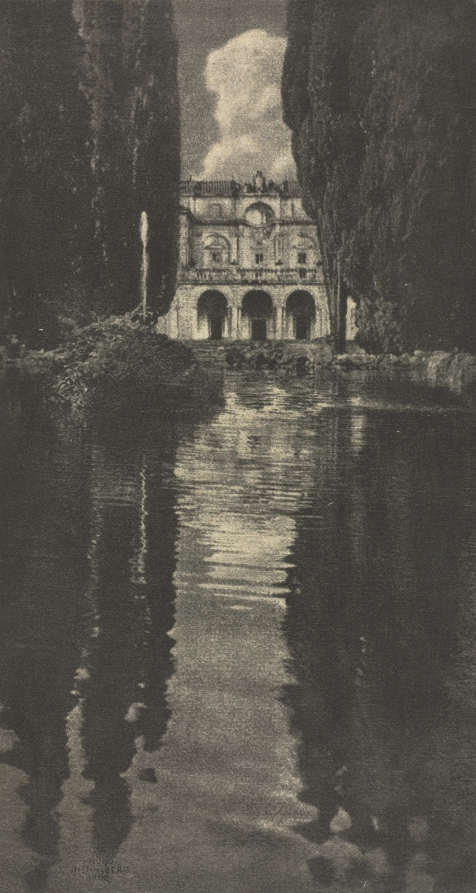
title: Camera Work: Villa Falconieri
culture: Austria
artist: Hugo Henneberg (Austrian, 1863–1918)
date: 1906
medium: photogravure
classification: Bound Volume